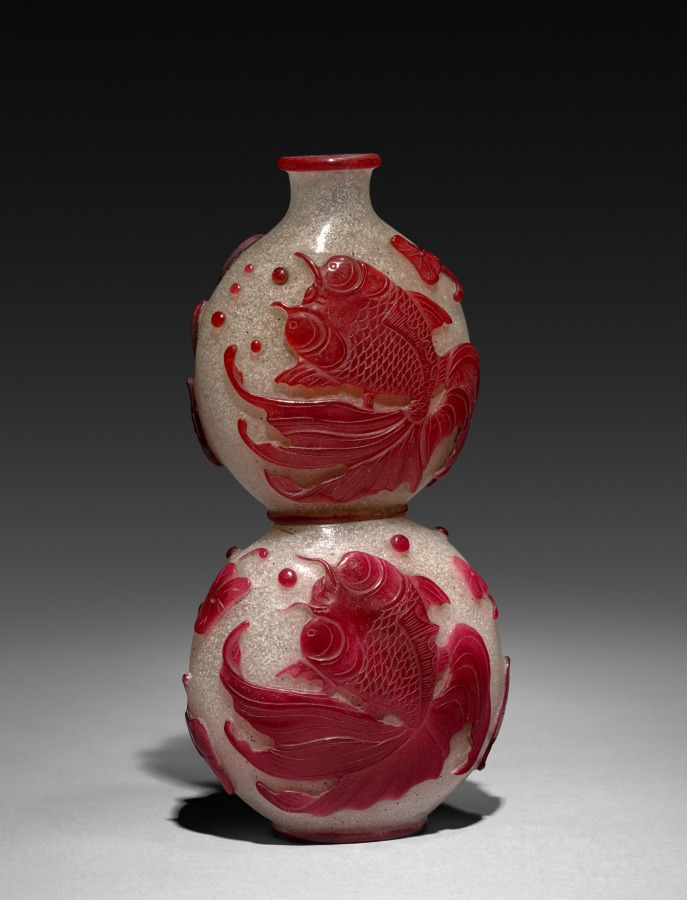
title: Gourd-Shaped Bottle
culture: China, Qing dynasty (1644-1911)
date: 1644–1911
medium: glass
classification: Glass